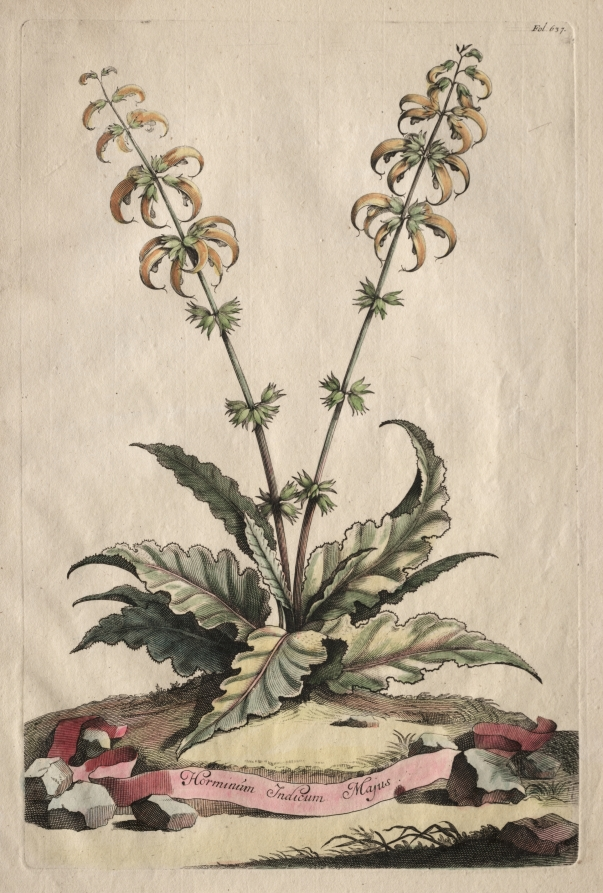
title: Phytographia Curiosa: Horminum Indicum Majus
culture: Netherlands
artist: Abraham Munting (Dutch, 1626–1683)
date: c. 1651–83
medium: etching, hand colored with watercolor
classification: Print